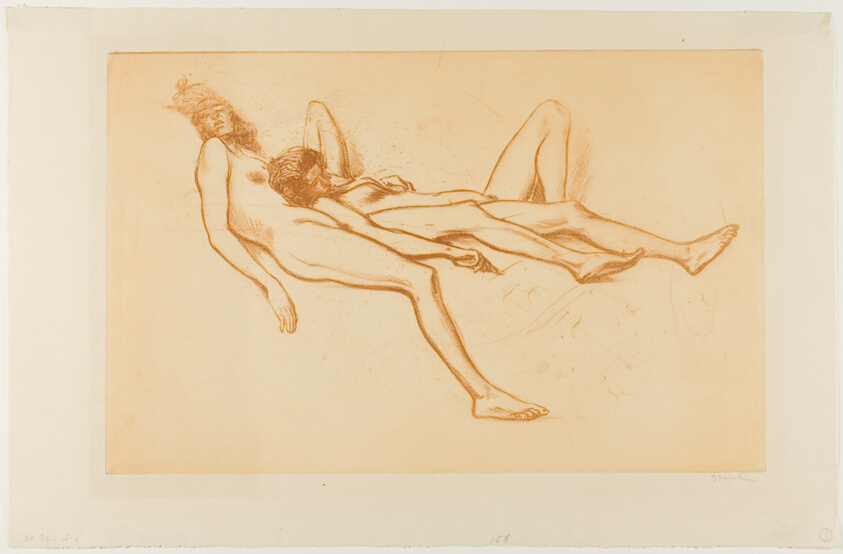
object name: Print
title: Two Nude Models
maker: Théophile-Alexandre Steinlen; French, born Switzerland, 1859-1923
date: 1902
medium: Soft ground etching in sanguine (red-brown) from a zinc plate on ivory wove paper with a pronounced mesh pattern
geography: France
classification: etching; print; prints and drawing